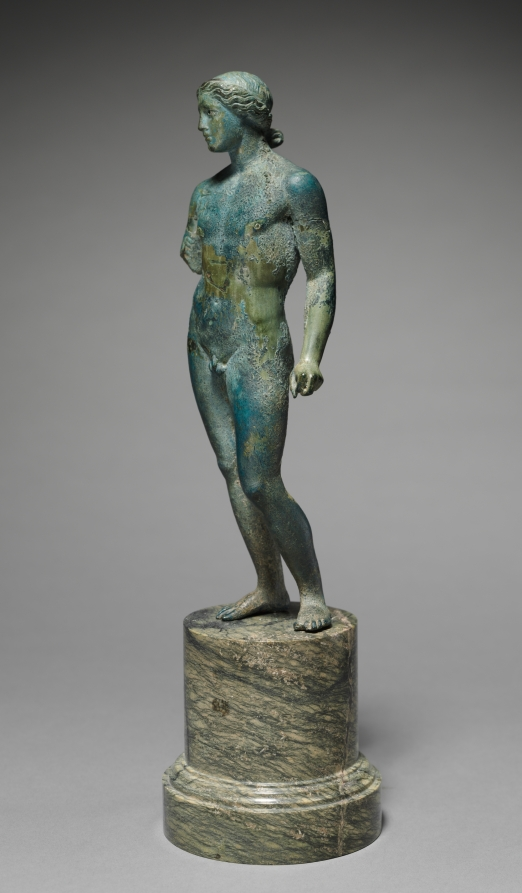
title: Athlete or Apollo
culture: Greece, Macedonia(?)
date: probably 100–1 BCE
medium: bronze with silver inlays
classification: Sculpture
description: This bronze statuette depicts a nude male, perhaps a young athlete or the youthful god Apollo. The figure is made from solid bronze, with a fillet of inlaid silver on his head. The figure’s right arm is broken off just above the elbow. If this is a statue of Apollo, he may have once held a bow and arrow; if it depicts an athlete, he could have held athletic equipment, a symbol of victory, or an offering dish.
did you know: The eyes of this figure are decorated with inlaid silver.